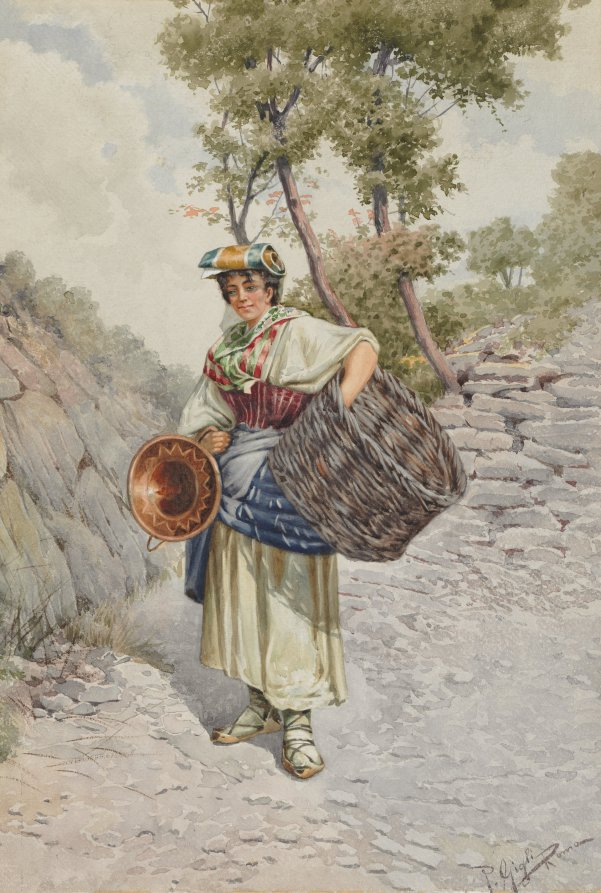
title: Peasant Girl on a Stony Road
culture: Italy, 19th century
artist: R. Gigli (Italian)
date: 1800s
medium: watercolor over traces of black chalk(?)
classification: Drawing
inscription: signed, lower right, in watercolor: P. Gigli / Roma